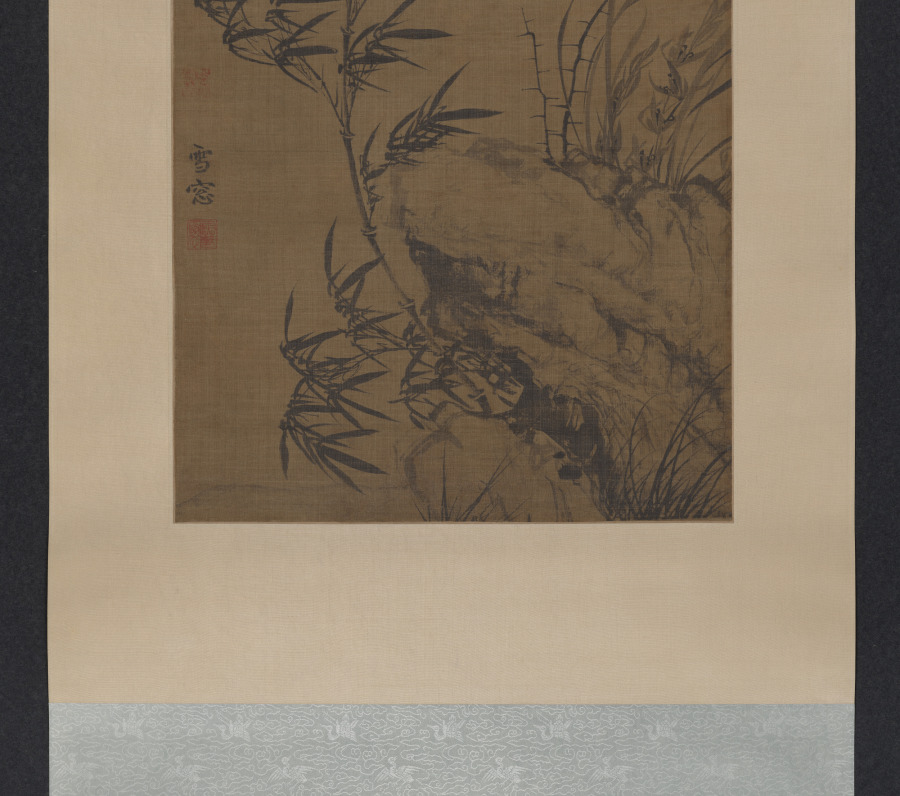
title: Bamboo in the Wind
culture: China, Yuan dynasty (1271-1368)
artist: Puming (Xuechuang) (Chinese, active before 1274-after 1329)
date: 1300s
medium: Hanging scroll; ink on silk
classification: Painting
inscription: Artist's signature and 2 seals, all reading: Xuechuang 雪窓.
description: Bamboo is an evergreen plant that does not break under the weight of snow or the force of the wind, and thus became a favorite motif in literati painting and Chan Buddhism as a metaphor for the virtue of not yielding to worldly temptations. Xuechuang, also known as monk Puming, was a native of Songjiang, near Shanghai, who spent his life as a monk in Suzhou. In 1338, he presided over Yunyan temple on Tiger Hill. Here, he masterfully depicts a bamboo gently bent in a subtle breeze. Puming’s paintings were revered in Japan and Korea.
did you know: Bamboo, pine, and plum, often referred to as the "three friends of winter," are popular motifs in Chinese literati art.